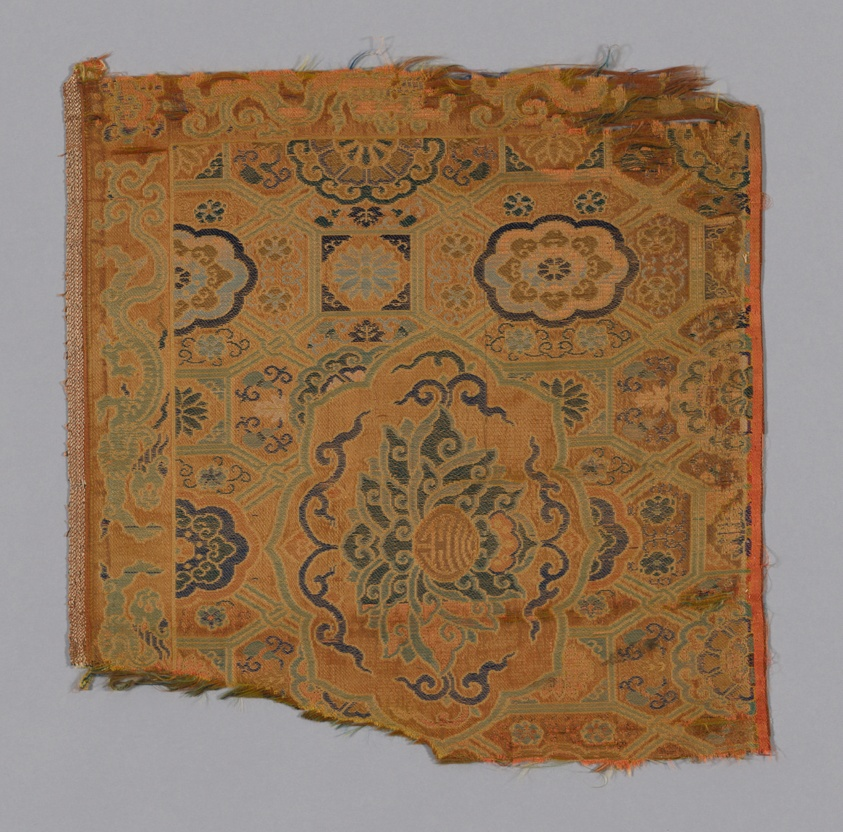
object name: Textile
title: Fragment (Furnishing Fabric)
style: ming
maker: China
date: Ming dynasty (1368–1644), 15th century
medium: Brocaded plain compound twill, silk and gilt paper wound on yellow silk core.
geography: China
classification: textile; weaving; furnishing textile